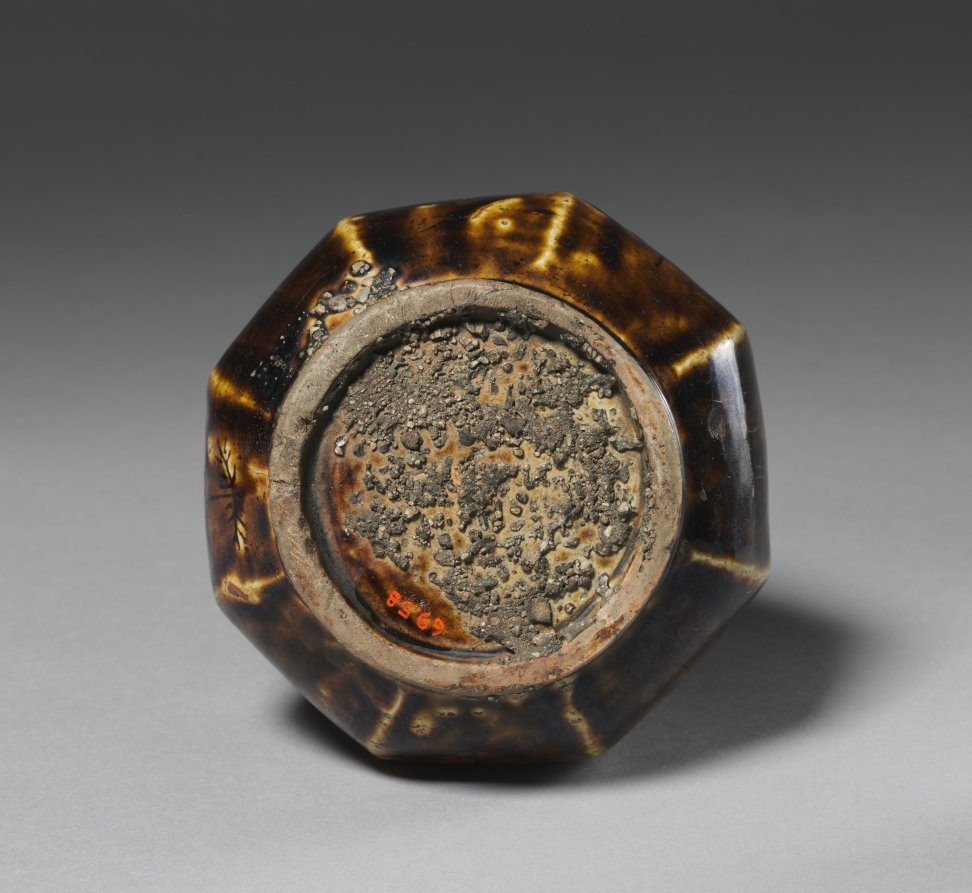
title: Eight-faceted Bottle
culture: Korea, Joseon dynasty (1392–1910)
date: 1800s-1900s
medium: stoneware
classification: Ceramic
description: Toward the end of the 1700s, multifaceted bottles like this one became popular with the growing demand from both the elites as well as the middle class. The dark-brown iron oxide pigment makes this eight-faceted bottle earthy, yet sophisticated.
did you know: The exquisite hue of this bottle is from iron oxide, also known as “purple oxide.”